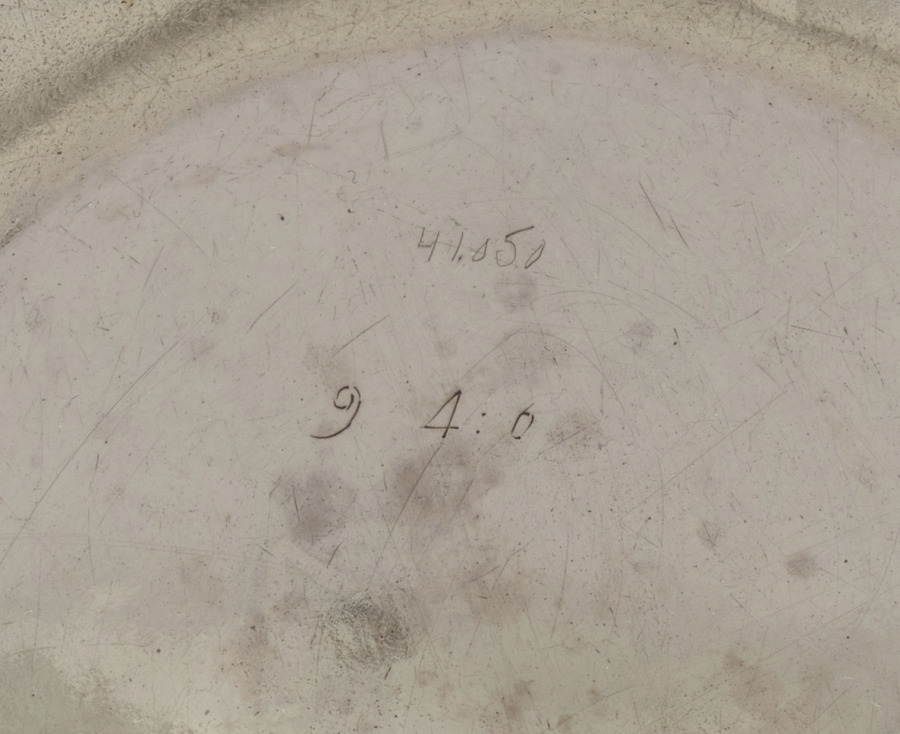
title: Porringer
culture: America, Massachusetts, Ipswich, 18th century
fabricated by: Daniel Rogers (American, 1735–1816)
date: c. 1760–1780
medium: silver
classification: Silver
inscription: engraved "K" over "E * S" in shaded block letters on top of handle. Scratched on bottom: "9 4 : 0."